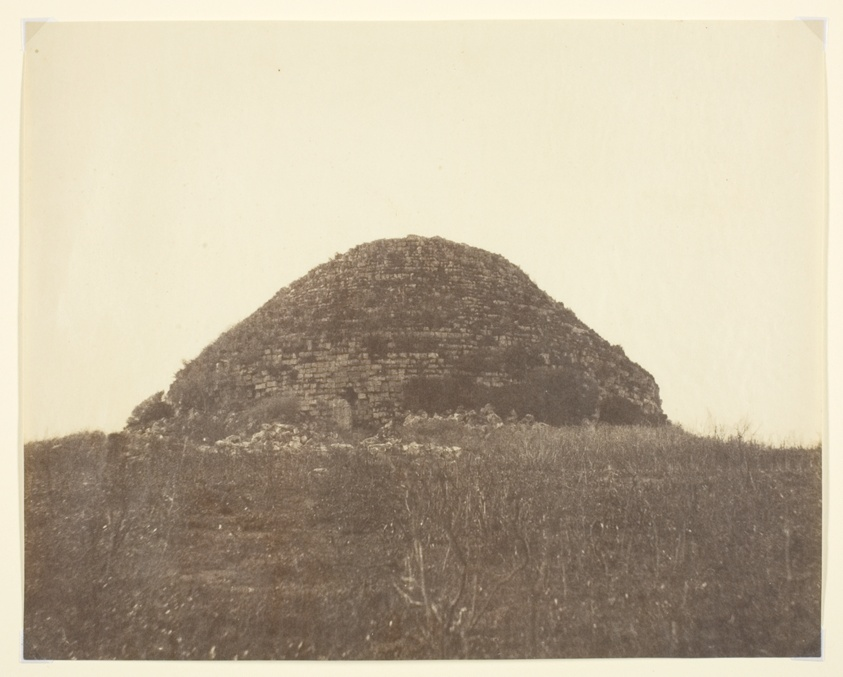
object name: Photograph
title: Tombeau de la chrétienne. Vue du côté nord. (Tomb of the Christian Woman. View of the North Side.)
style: 19th century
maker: John Beasley Greene (American, born France, 1832–1856)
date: 1855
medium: Albumen print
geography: United States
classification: albumen silver print; photographic process; photography; photograph